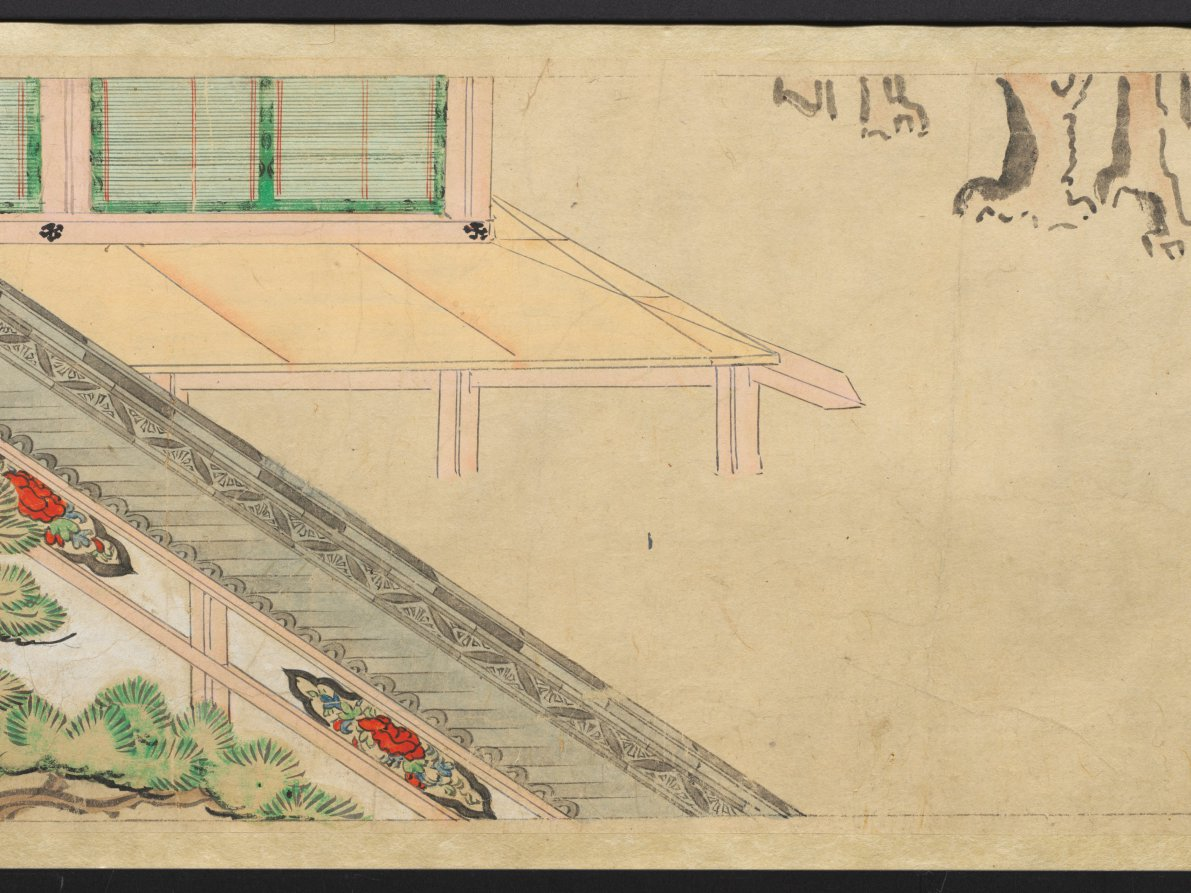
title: The Saltmaker's Story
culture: Japan, Edo period (1615–1868)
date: early 1600s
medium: One of a pair of handscrolls; ink, color, and gold on paper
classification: Painting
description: Once read and copied by girls at New Year’s celebrations and included in dowries, The Saltmaker’s Story is a rags-to-riches tale in which daughters are gifts from the gods. Despite his simple outlook, the main character progresses from humble roots as an associate at Kashima Shrine to the elite status of grandfather of the emperor through the intervention of the Kashima deity. The Saltmaker’s Story is traditionally presented in a set of three scrolls, but the text of this set has been removed by a previous owner, who remounted the illustrations as a pair. The paintings of this one take us from right to left through the second half of the tale.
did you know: This handscroll originally had texts before its paintings, but the texts were removed.